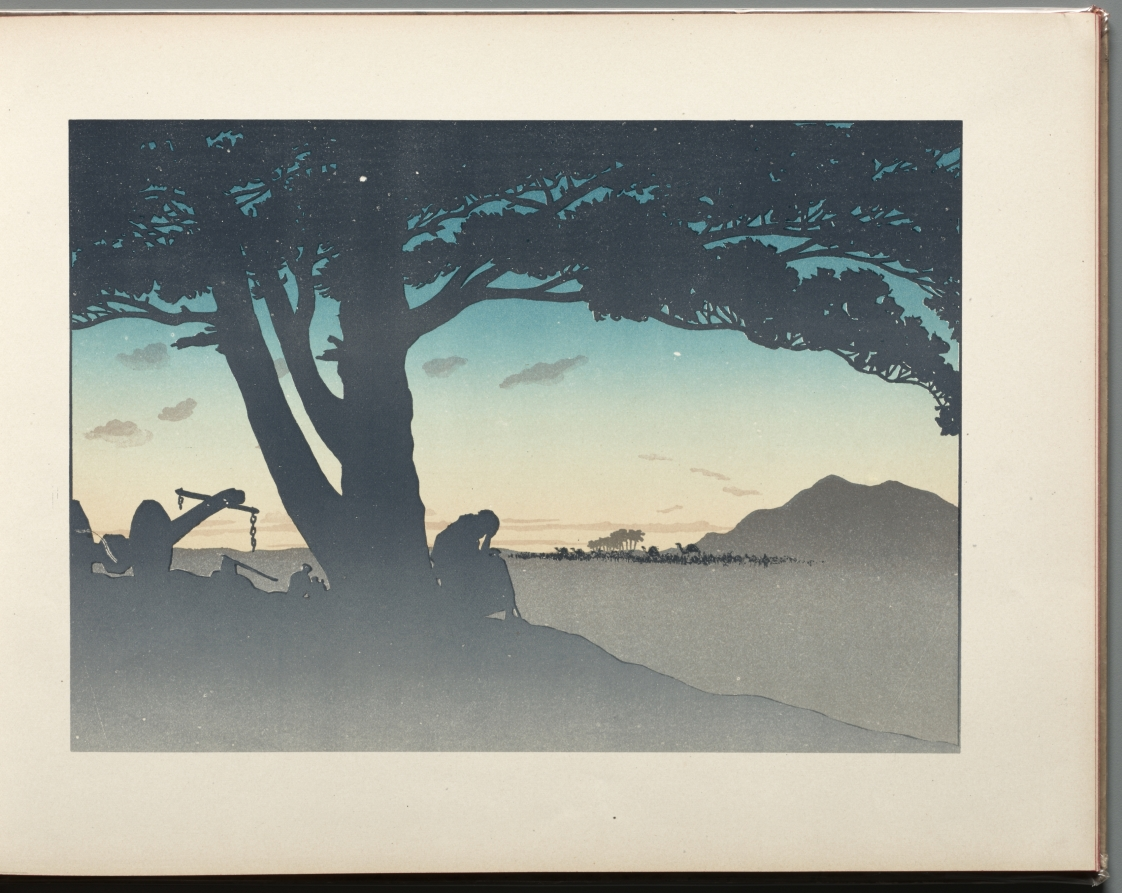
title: The Prodigal Son: page 17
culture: France, 19th century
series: Bound Volume illustrating the poetry and music of Georges Fragerolle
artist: Henri Rivière (French, 1864–1951)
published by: E. Flammarion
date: 1895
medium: 15 color lithographs in a bound volume illustrating the poetry and music of Georges Fragerolle: color lithograph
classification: Bound Volume